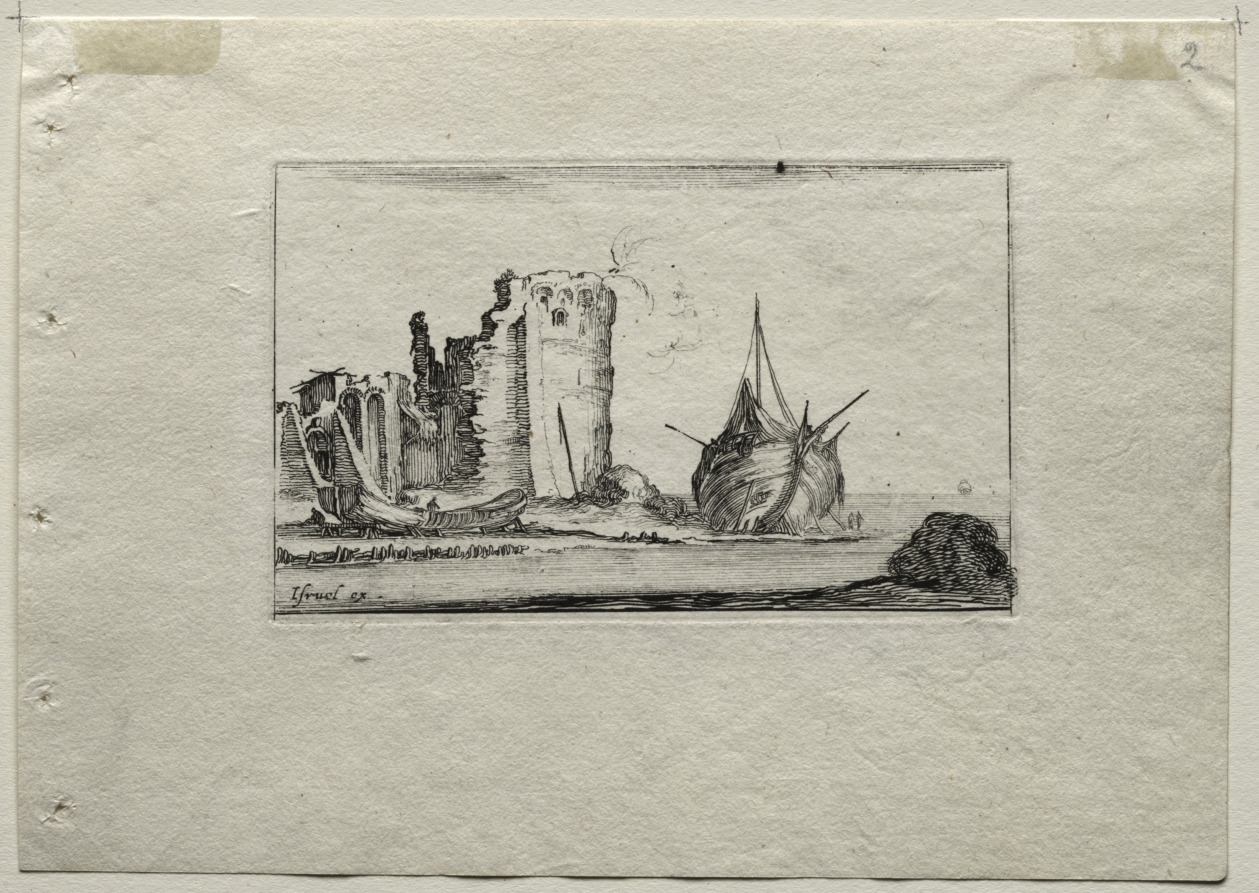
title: Caprices: Marine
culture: Italy, 17th century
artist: Stefano Della Bella (Italian, 1610–1664)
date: c. 1642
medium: etching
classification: Print